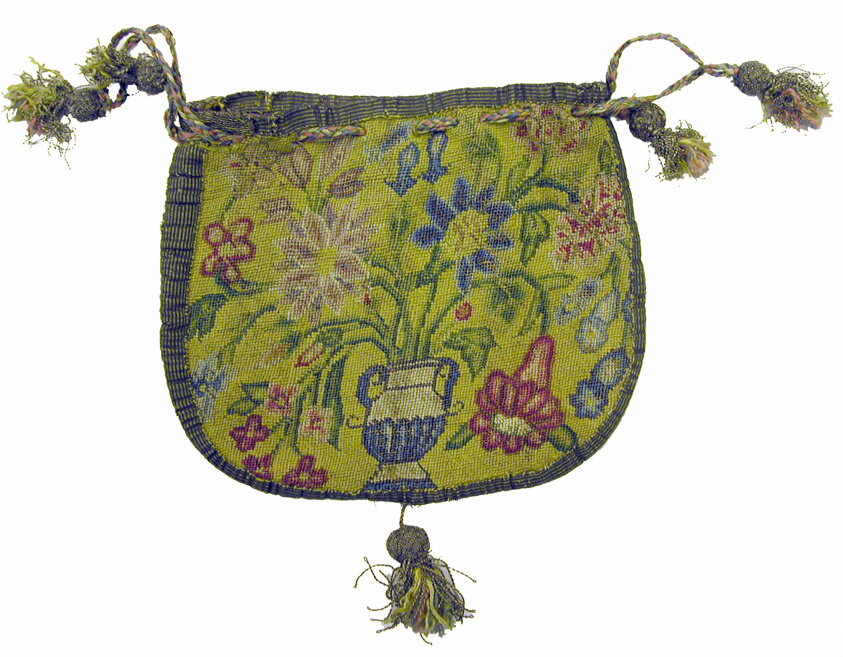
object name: Costume and Accessories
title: Bag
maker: England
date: 17th century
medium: Linen, plain weave; embroidered with silk threads in tent stitch; edging: silk and gilt-metal-strip-wrapped silk, plain weave; drawstrings; silk, plaited; tassels: silk and gilt-metal-wrapped silk, plaited; lining: silk, plain weave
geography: England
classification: textile; bag - needlework; costume accessory - bag; costume accessory; costume